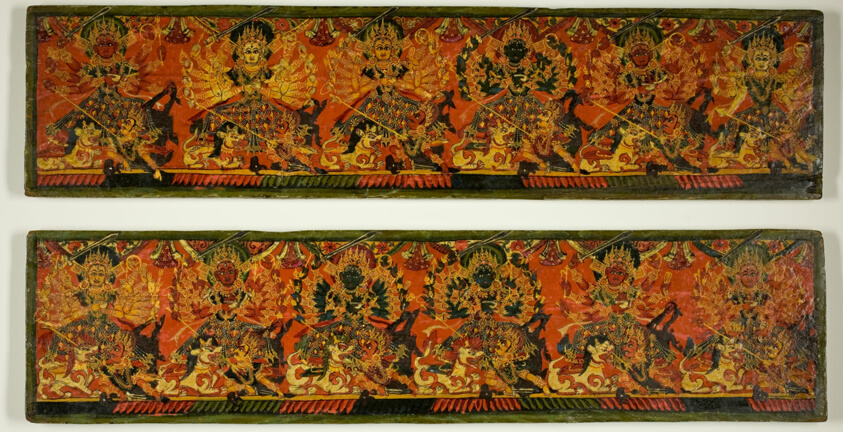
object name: Painting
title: One of a Pair of Manuscript Covers from the Glorification of the Great Goddess (Devimahatmya)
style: Himalayan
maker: Nepal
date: 18th century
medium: Pigments and metallic paint on wood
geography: Nepal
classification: painting